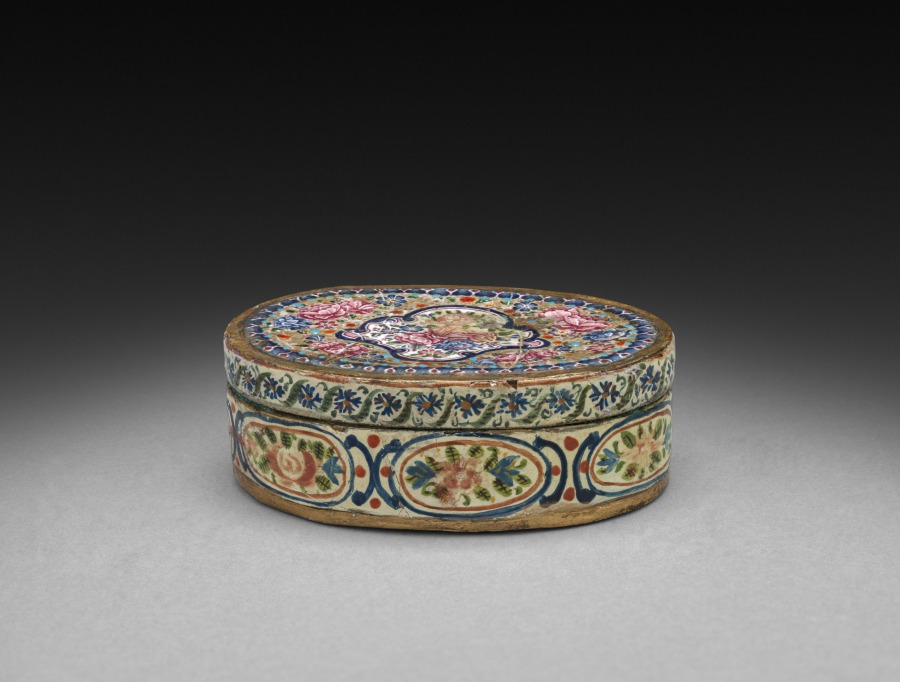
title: Box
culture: China, Qing dynasty (1644-1911) or Republican period (1912-49)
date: 1900–1916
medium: enamel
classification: Enamel